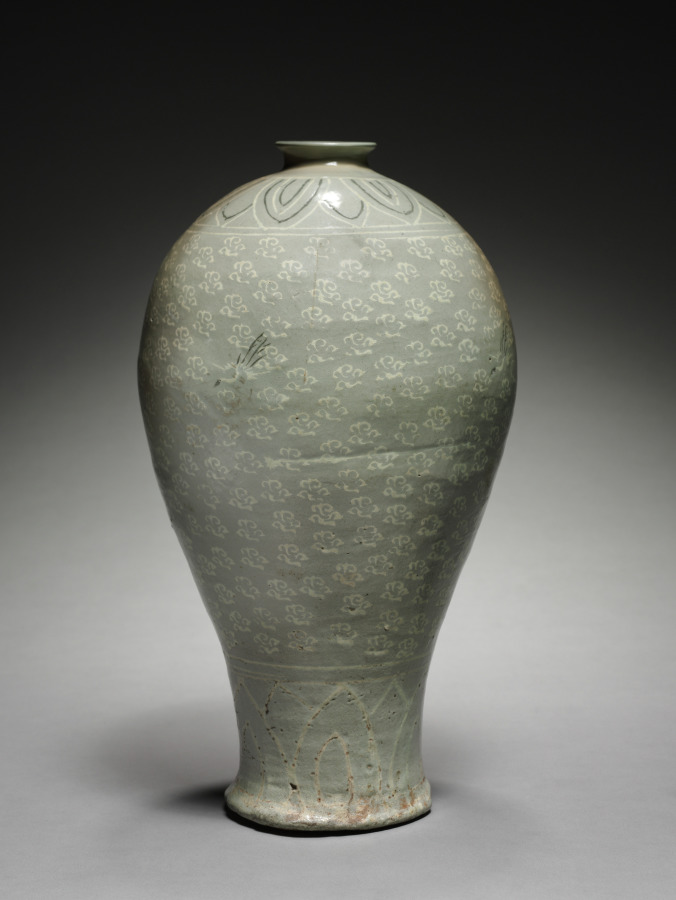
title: Prunus Vase with Inlaid Clouds and Flying Cranes Design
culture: Korea, Goryeo dynasty (918–1392)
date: 1300s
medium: celadon ware with inlaid white and black slip decoration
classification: Ceramic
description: As early as the seventh century, the practice of drinking tea and wine became an important part of elite culture in Korea. Once used to store alcoholic beverages, this type of vase features a wide body followed by a sharply rounded shoulder, a short neck and a small opening. Most of the remaining examples no longer have a lid, but originally it may have had a lid that not only covered the opening, but also served as a cup.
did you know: Prunus vases such as this one are often believed to contain a branch of plum blossoms, but recent research reveals that these lidded vases were also used to contain cooking liquid such as sesame oil.